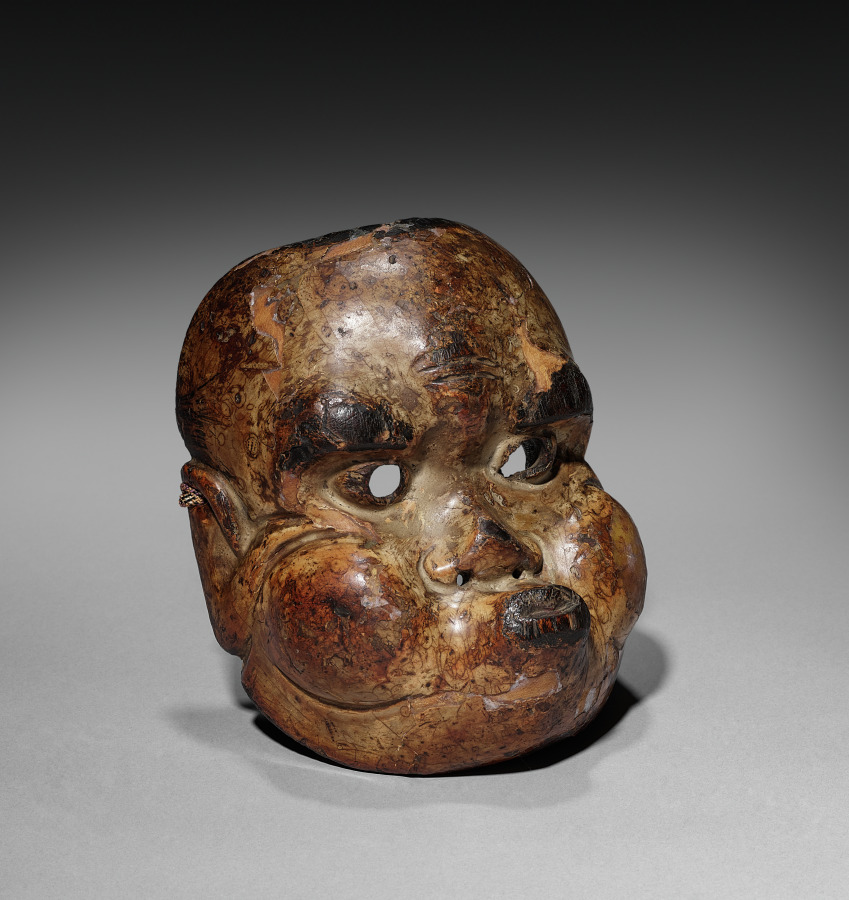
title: Kyogen Mask: Whistler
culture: Japan, Edo period (1615–1868)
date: 1600s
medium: wood with color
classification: Sculpture